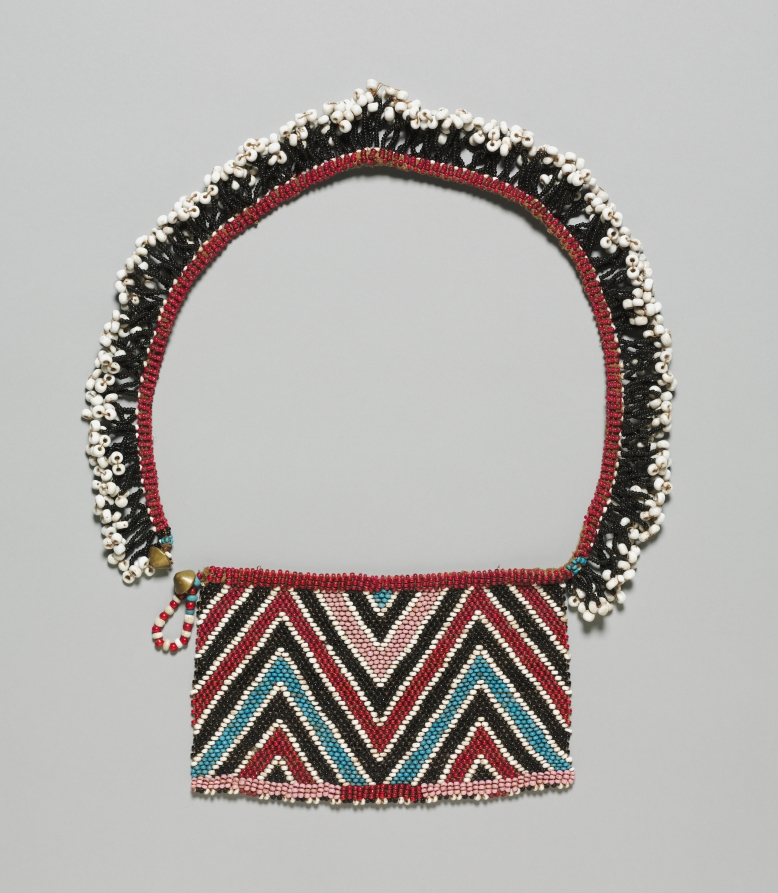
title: Neckpiece with panel (umphapheni)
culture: Africa, Southern African, South Africa, Southeast Cape Region, Northern Nguni (Zulu)-style maker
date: 1800s–1900s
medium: Glass beads, plant fiber, copper alloy, and iron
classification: Jewelry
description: Consisting of a tasseled length attached to a rectangular panel joined by metal buttons, this neckpiece (umphapheni) was likely worn along with waistbands and headpieces with the same color scheme and patterns. Joined together using stitches and zig-zag patterns popular around the turn of the 20th century, glass beadwork was heavy to wear. The fringe—typical of Zulu-style Northern Nguni beadwork—added additional weight. The imported glass beads testify to centuries of trade connections between southern Africa and Europe, while the brass buttons—probably drawn from a British soldier’s uniform—allude to the Anglo-Zulu conflicts of the 1800s.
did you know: The seed beads that make up this neckpiece were imported to southern Africa by European traders who tailored their wares to local tastes and color preferences; beads came first from Venice and Murano, and later from Bohemia in the twentieth century.